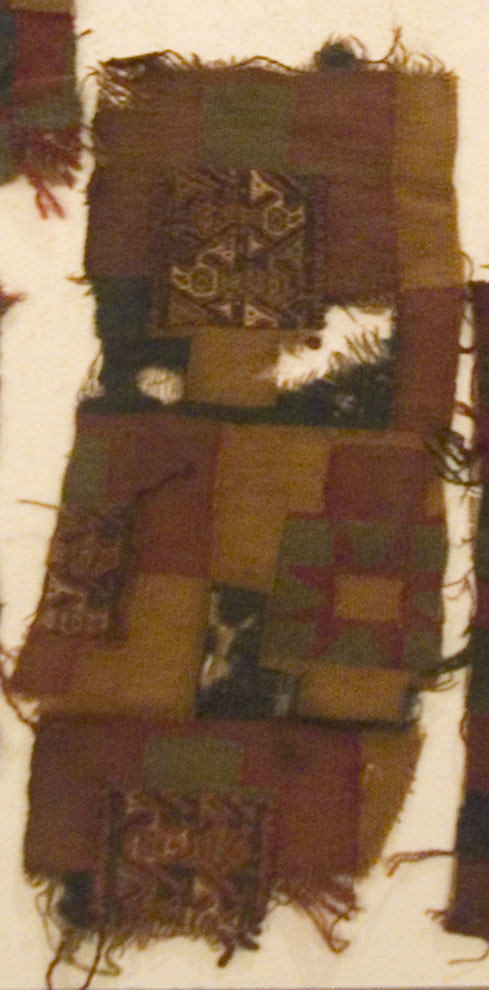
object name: Textile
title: Fragment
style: Chuquibamba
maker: Chuquibamba (Probably south coast, Peru)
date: A.D. 1476/1532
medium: Brocaded interlocking tapestry weave (old card)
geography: Peru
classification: textile; weaving